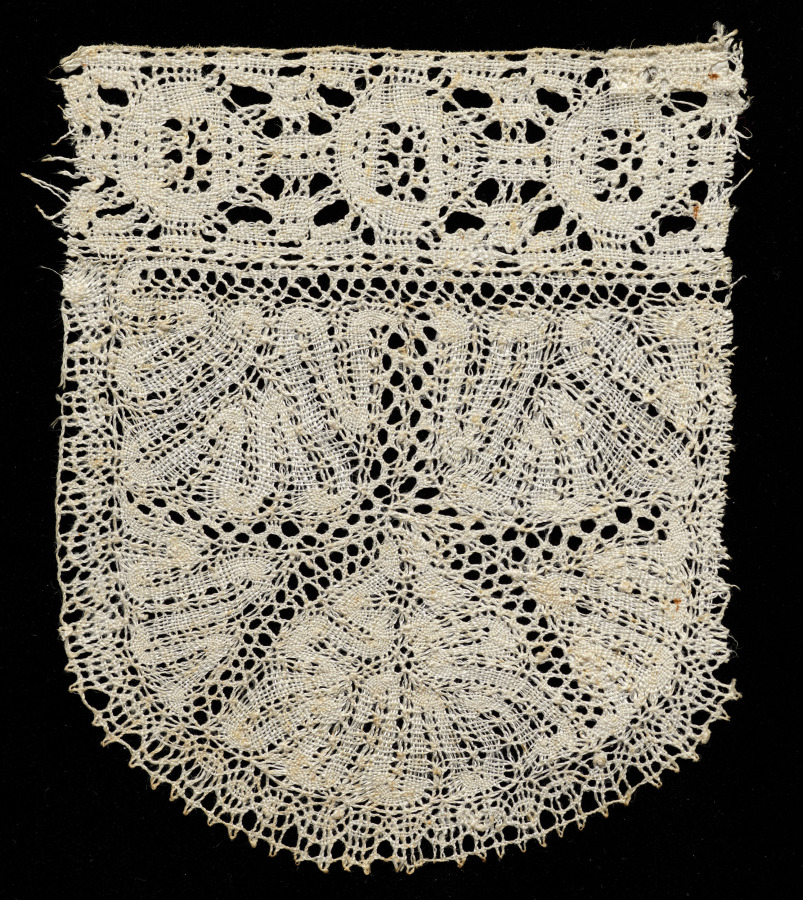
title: Lace Edging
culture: Spain, Huelva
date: 1500s–1600s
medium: Bobbin lace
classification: Lace